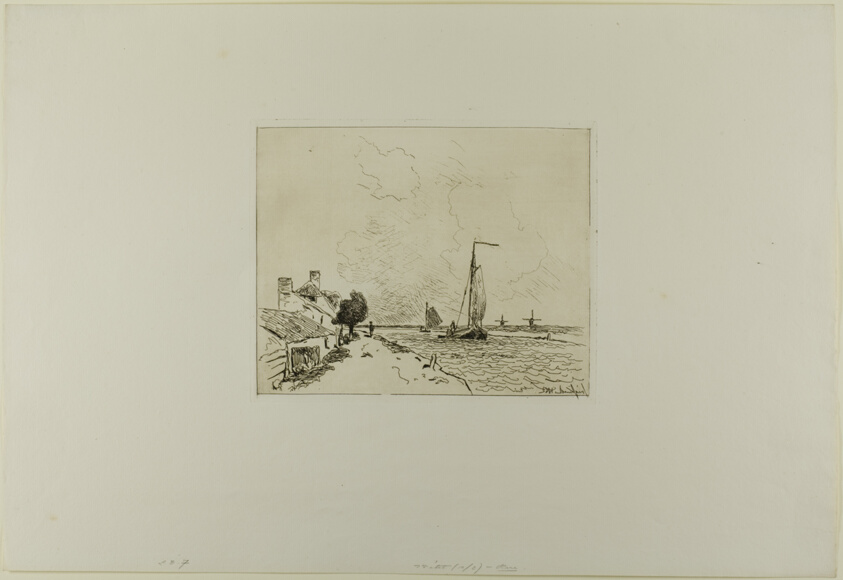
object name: Print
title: The Two Sailboats, from Cahier de six eaux-fortes, vues de Hollande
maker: Johan Barthold Jongkind (Dutch, 1819-1891)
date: 1862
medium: Etching in brownish-black on ivory laid paper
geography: Netherlands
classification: etching; paper; print; prints and drawing